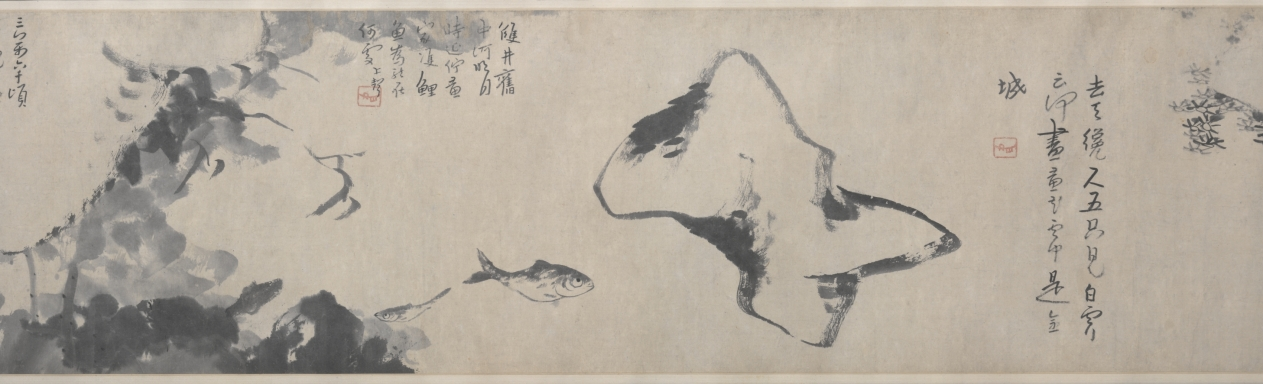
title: Fish and Rocks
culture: China, Qing dynasty (1644-1911)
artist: Bada Shanren (Chinese, 1626–1705)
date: mid- to late 1600s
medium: Handscroll; ink on paper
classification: Painting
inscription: 去天纔尺五，只見白雲行。 云何畫黃花，雲中是金城。 [印] 个山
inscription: 雙井舊中河，明月時延佇。 黃家雙鯉魚，為龍在何處。 [印] 个山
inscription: 三萬六千頃，畢竟有魚行。 到此一黃頰，海潮次上笙。 [印] 个山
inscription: 5 additional seals: 2 of Zhang Daqian 張大千 (1899–1983); 1 of Ta-an Chü-shih; 2 unidentified.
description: Bada Shanren, also called Zhu Da, a 17th-century painter who rejected conventions in favor of an individual, personal expression, is known for his unorthodox compositions of fish, flowers, birds, and rocks. Fish in his paintings are often looking upward toward heaven, swimming in a pond of undefined space. As a member of the Ming imperial family, Zhu Da lost his princely status and hid in a monastery when the Manchus, foreigners from the north, established the Qing dynasty in 1644. This scroll may have some autobiographical meaning, representing fish as leftover subjects (yimin) who lived in a void, having lost their roles in life after the fall of the dynasty.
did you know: After each poem, Bada Shanren used his so-called jixingyin seal 屐形印, which resembles the impression of a shoe on soft mud.